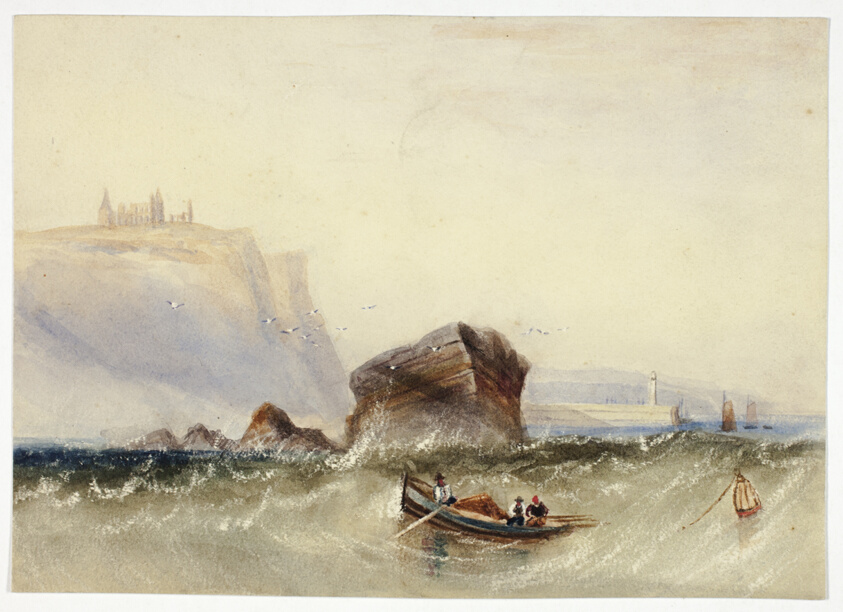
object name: Drawing and Watercolor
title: Three Men in Rowboat off Rocky Coast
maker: Circle of Henry Barlow Carter (British, 1803-1867); or attributed to Joseph Newington Carter (British, 1835-1871)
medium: Watercolor, with scraping, on ivory wove paper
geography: England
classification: watercolor; drawings (visual works); prints and drawing